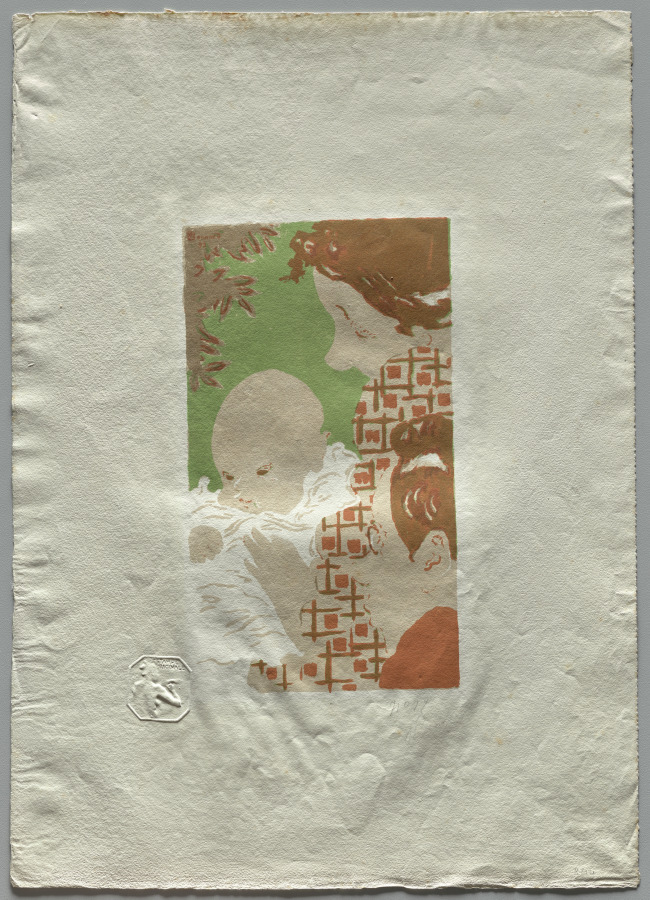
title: Family Scene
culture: France, 19th century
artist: Pierre Bonnard (French, 1867–1947)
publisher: L'Estampe Originale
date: 1893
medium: color lithograph on beige wove paper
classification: Print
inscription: signed and inscribed, lower right, in graphite: no. 22 / P. Bonnard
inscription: at lower left: blind stamp of L’Estampe Originale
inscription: in pencil on recto, lower right: "No. 6 (?)/P. Bonnard (signed)"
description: Pierre Bonnard favored domestic scenes, often focusing on the intimacy of family life. This early lithograph is one of several that he made depicting his sister Andrée and her infant son Jean, born the year before. Bonnard included himself in the image at lower right, gazing at his nephew. The awkward cropping of the figures of the artist and his sister, along with the flat planes of color throughout the image, suggest the influence of Japanese woodblock prints on Bonnard during this period.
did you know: The embossed mark below the lower left corner of this print indicates that it was included in L'Estampe Originale, a monthly luxury publication during the 1890s that featured original prints.